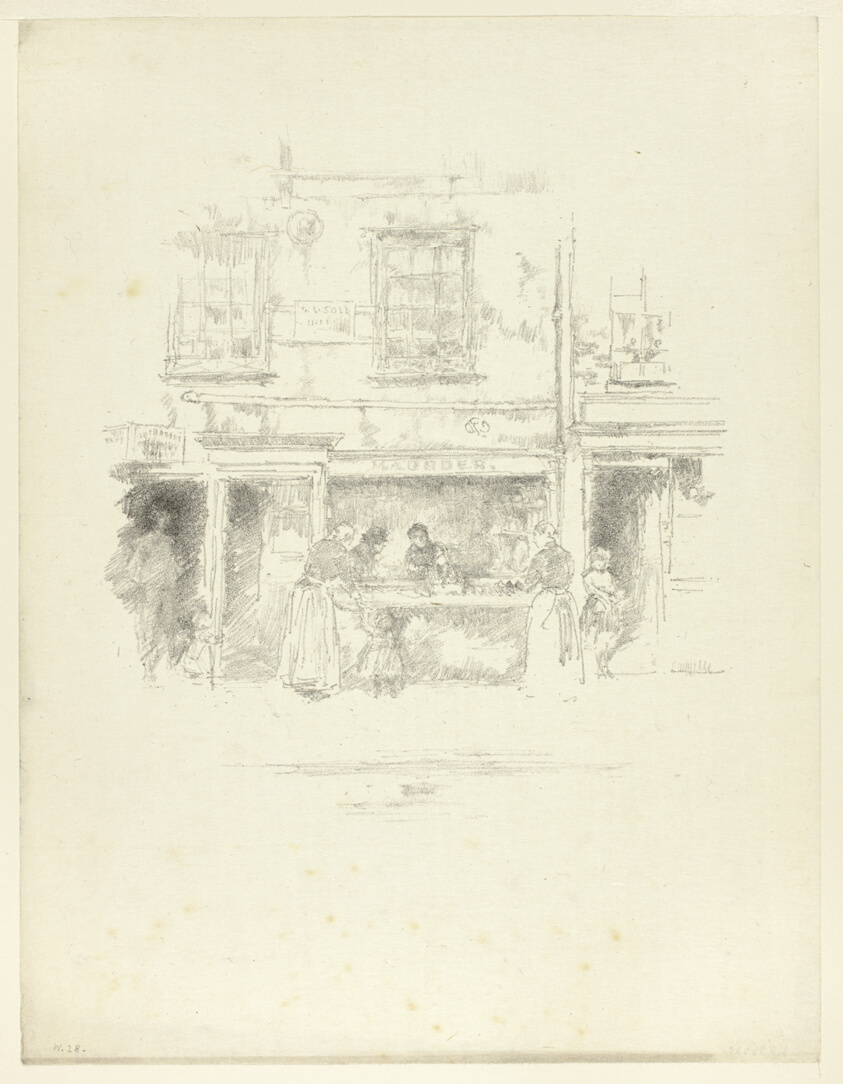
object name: Print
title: Maunder's Fish Shop, Chelsea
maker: James McNeill Whistler (American, 1834-1903)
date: 1890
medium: Transfer lithograph in black with scraping, on cream Japanese paper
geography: United States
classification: transfer lithograph; lithograph; print; prints and drawing; paper